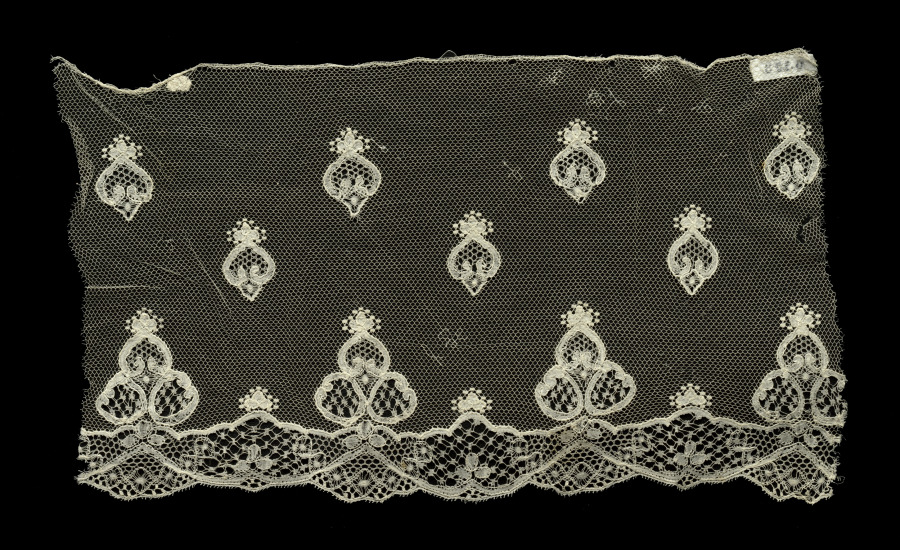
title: Lace Flounce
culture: England, Buckinghamshire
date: 1700s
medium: Bobbin lace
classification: Lace